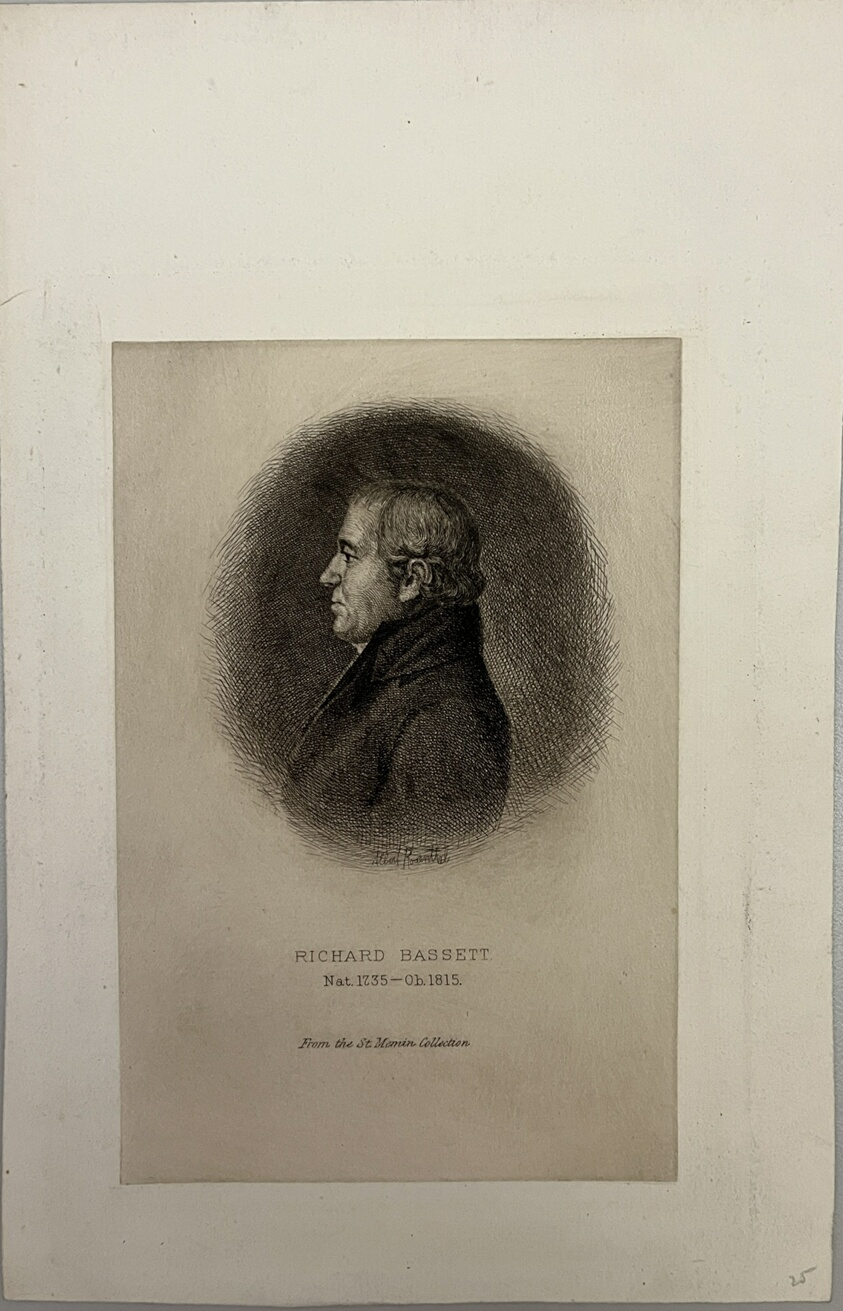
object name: Print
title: Richard Bassett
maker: Albert Rosenthal (American, 1863-1939)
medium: Etching on paper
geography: United States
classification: reproduction; print; prints and drawing